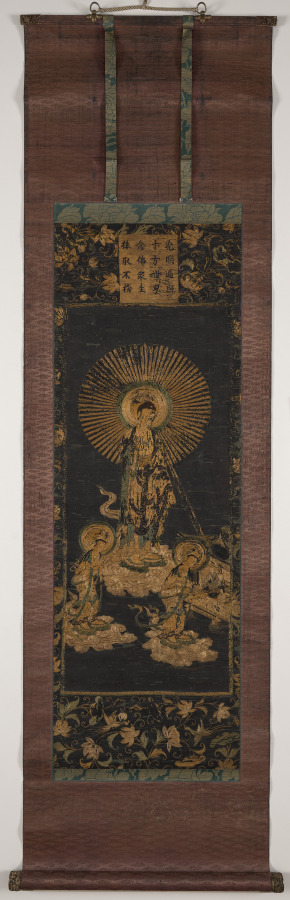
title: Embroidered Welcoming Descent of Amida Triad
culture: Japan, Muromachi period (1392–1573)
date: 1400s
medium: Hanging scroll; silk and human hair embroidery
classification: Embroidery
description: The Buddha Amida arrives here to welcome a person to his Pure Land at the moment of death. A monk, a woman, and a child sit with their hands in prayer, and a beam of light emanating from Amida extends toward them. The inscription at the top indicates that the compassion of Amida Buddha always flows impartially to all those who recite his name, a quote from the Contemplation Sutra.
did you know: The Contemplation Sutra is a sacred Buddhist text often used in Pure Land Buddhism.